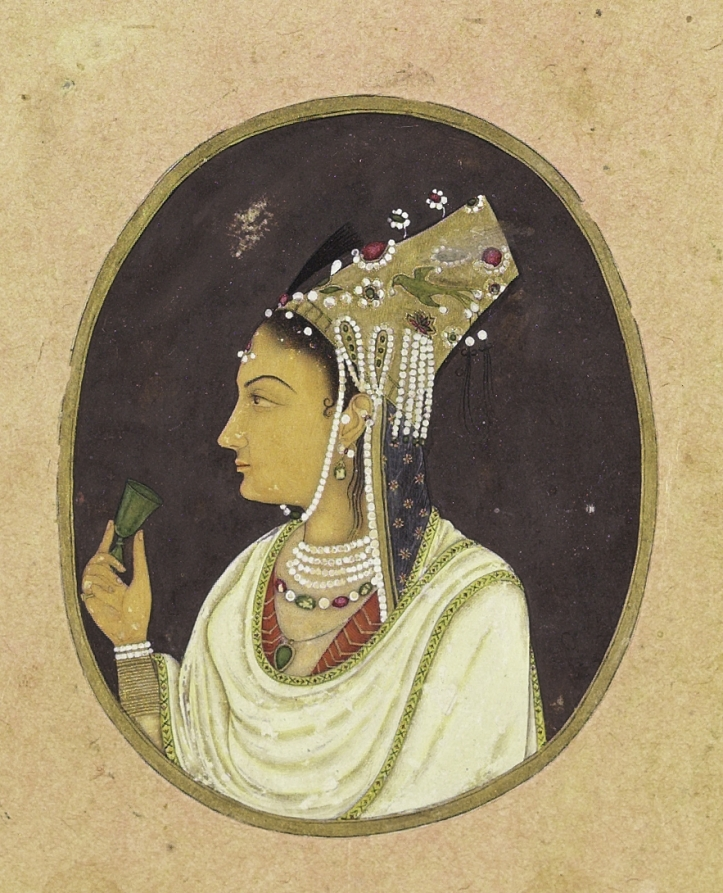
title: Oval portrait of a woman in a Chaghtai hat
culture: India, Mughal, 18th century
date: c. 1740–50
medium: Gum tempera and gold on paper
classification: Painting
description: The tall, flat-topped hat is an element of the native dress of the Mughals from eastern Uzbekistan. Of mixed Turkic and Mongol ethnicities, they spoke a Turkic language known as Chaghatai. Chaghatai refers to the name of the son of the Mongol Chingiz (Genghis) Khan, who ruled this area of Central Asia from 1246 to 1282. This woman’s hat has been studded with jewels and strings of pearls. The portrait jewel format that was once reserved for the emperor has now been expanded to include ladies of the court. The woman holds a jade wine cup and wears a draped upper garment with a woven or embroidered border similar to the fragment on display at the left.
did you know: She holds a delicate jade cup of the type for which the Mughals were famous.